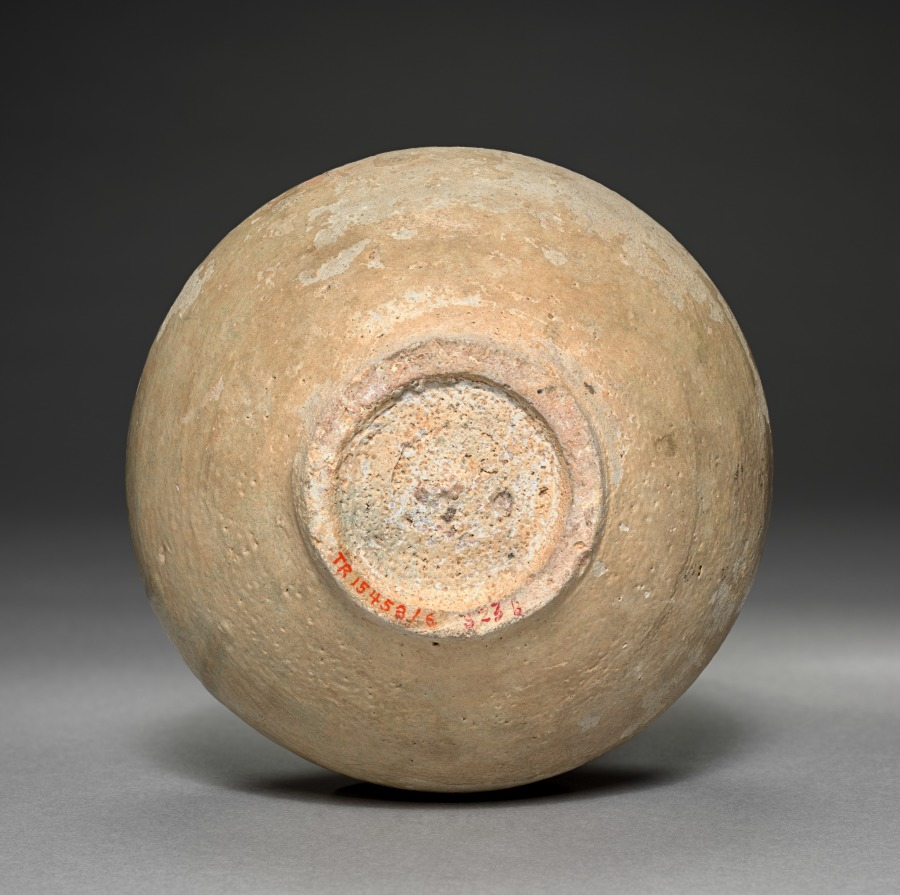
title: Jar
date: 1100s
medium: Pottery, glazed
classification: Ceramic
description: This jar is one of the rare porcelain examples from the Goryeo period (918–1392). In Korea at that time, both celadons and porcelains were produced in the same kilns, explaining why this porcelain jar bears a greenish blue glaze.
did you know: This jar is one of the rare porcelain examples from the Goryeo period (918–1392).